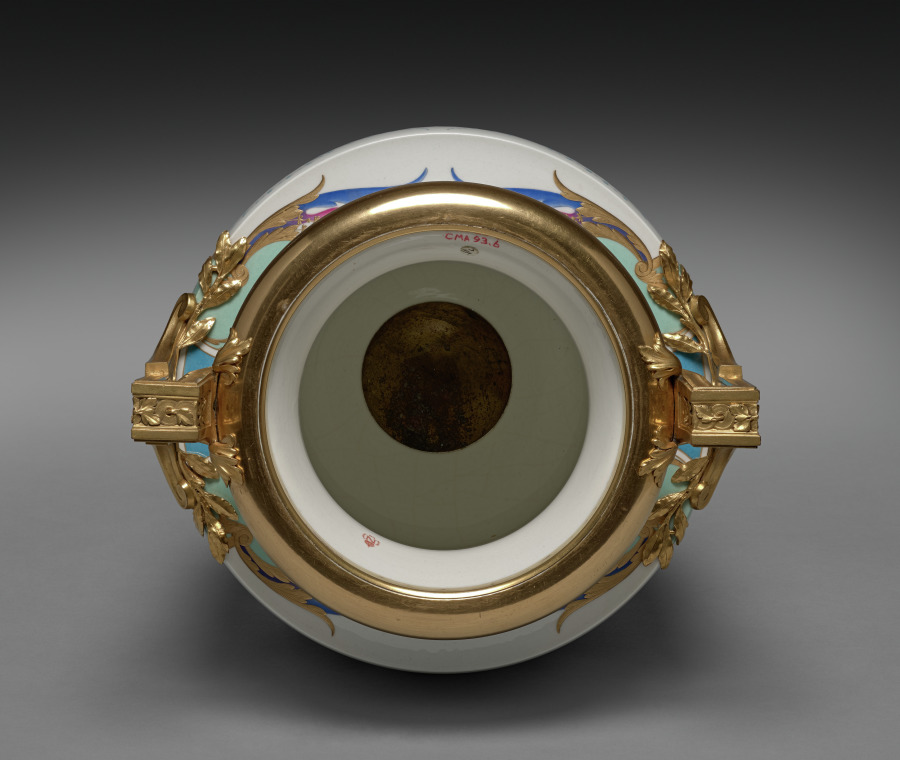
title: Vase, Feuille d'Eau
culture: France, Sèvres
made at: Sèvres Porcelain Factory (French, est. 1756)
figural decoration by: Paul Marie Roussel (French, 1804–1877)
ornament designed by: Emile Renard (French)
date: 1858–62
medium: porcelain with gilt bronze mounts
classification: Ceramic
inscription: figural paintings signed obverse and reverse: "PMROUSSEL INV & PIN"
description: Feuille d'Eau means "waterleaf" and refers to the name given to the shape of this vase at the Sèvres factory. In English, waterleaf is the common name for a plant with bell-shaped flowers. The term is also applied to a stylized plant motif used in Graeco-Roman ornament. This vase was exhibited by the Sèvres firm at the International Exhibition held in London in 1862.